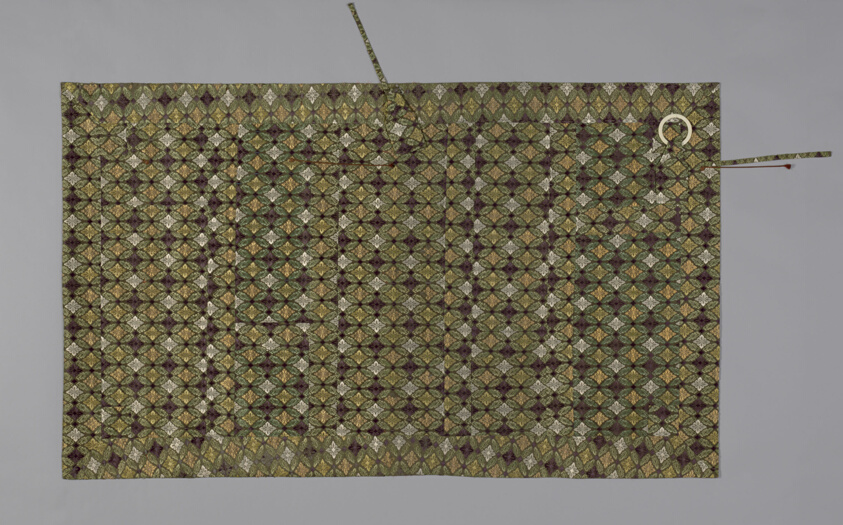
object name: Textile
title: Kesa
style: edo (japanese period)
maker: Japan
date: Second half of the 18th century, Late Edo period (1789–1868)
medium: Silk; plain weave, embroidered with silk and gilt-paper-strip-wrapped silk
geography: Japan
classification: textile; needlework (visual works); weaving; liturgical - buddhist